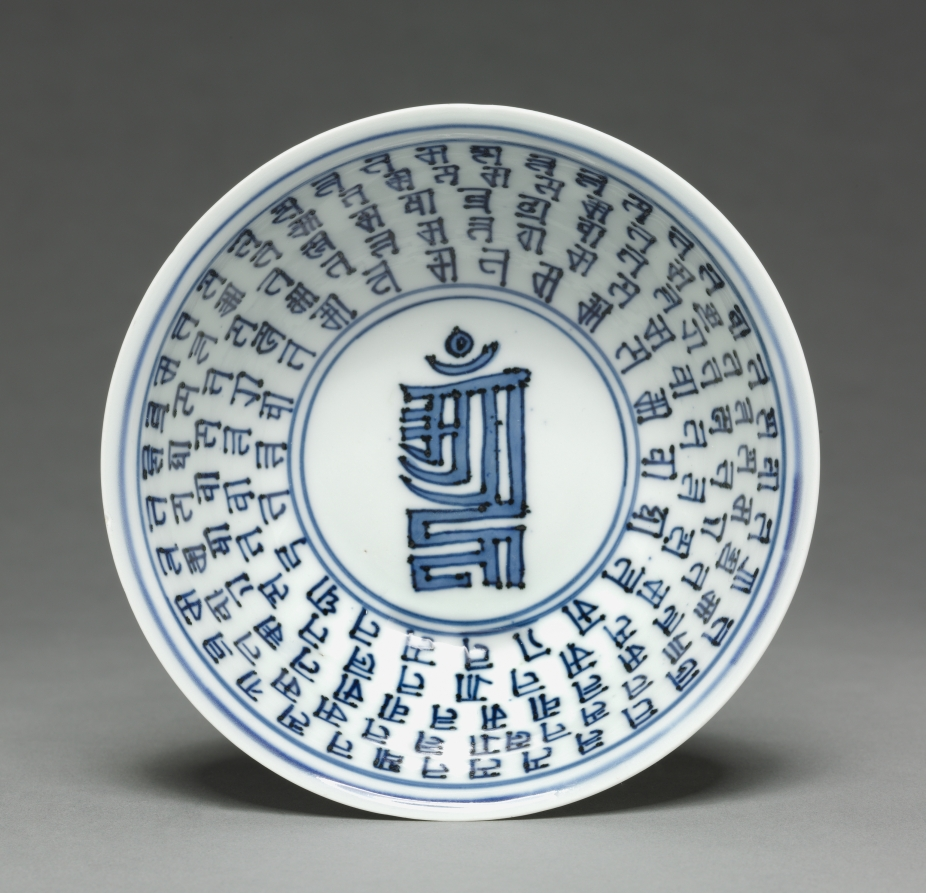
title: Bowl with Bands of Tibetan (Lança) Characters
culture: China, Jiangxi province, Jingdezhen kilns, Ming dynasty (1368-1644), Wanli mark and reign (1573-1619)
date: 1572–1620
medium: porcelain with underglaze blue decoration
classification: Ceramic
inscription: 大明萬曆年製